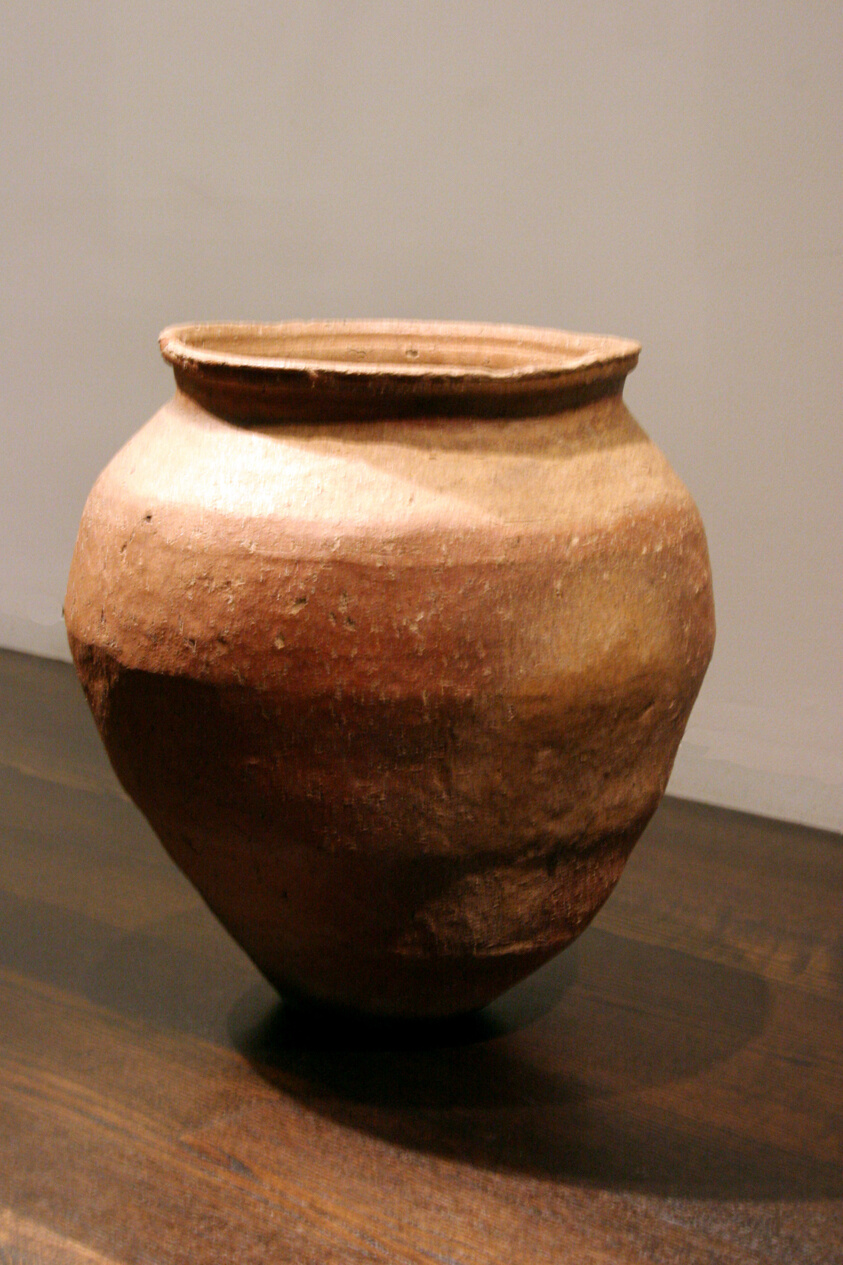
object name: Vessel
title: Shigaraki-Ware Jar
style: Japanese (culture or style)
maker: Japan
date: 14th century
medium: Stoneware with ash glaze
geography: Japan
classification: stoneware; ceramics; asian art; vessel